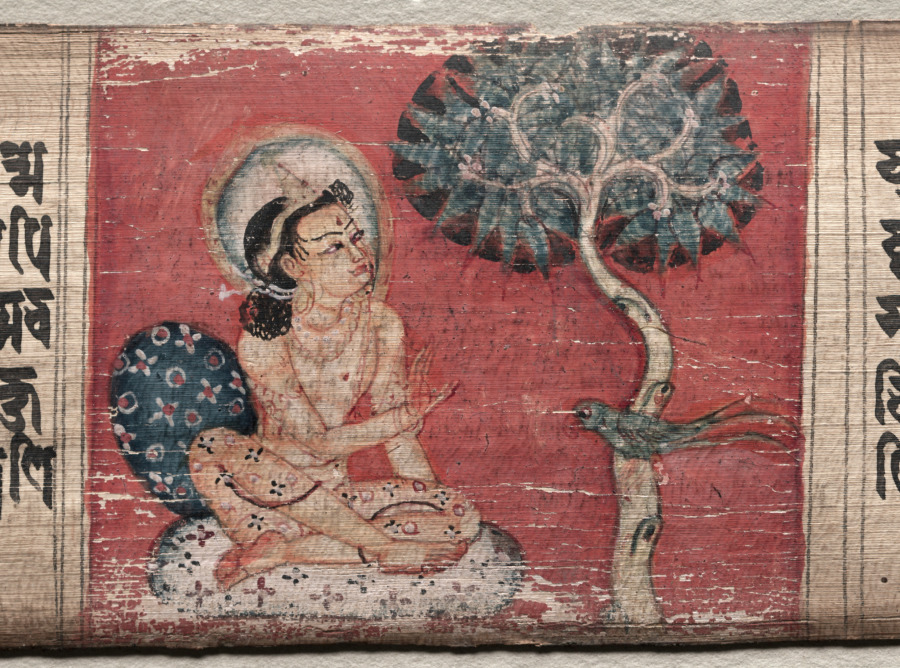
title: Sudhana and a parrot, folio 20 (recto) from a Gandavyuha-sutra (Scripture of the Supreme Array)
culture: Nepal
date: 1000–1100s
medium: gum tempera and ink on palm leaf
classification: Painting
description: On his quest to find teachers to guide him to enlightenment, the pilgrim Sudhana traveled alone through the wilderness. The tree and parrot indicate the forests of southern India. Graceful lines and vibrant color contribute to the enduring visual appeal of the paintings of this manuscript. In a stylistic convention of the time, the artist extended the "farther eye" beyond the contours of the face.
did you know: The parrot is actually an Indian ring-necked parakeet, with red beak and long tail.